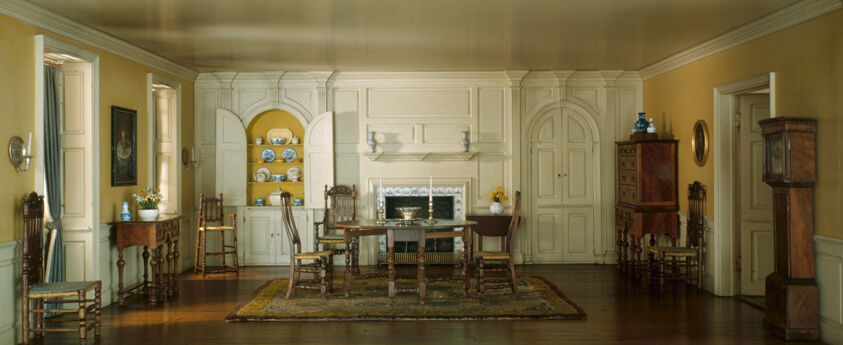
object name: Miniature room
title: A3: Massachusetts Dining Room, 1720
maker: Designed by Narcissa Niblack Thorne; American, 1882-1966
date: c. 1940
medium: Miniature room, mixed media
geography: United States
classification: miniature; thorne rooms